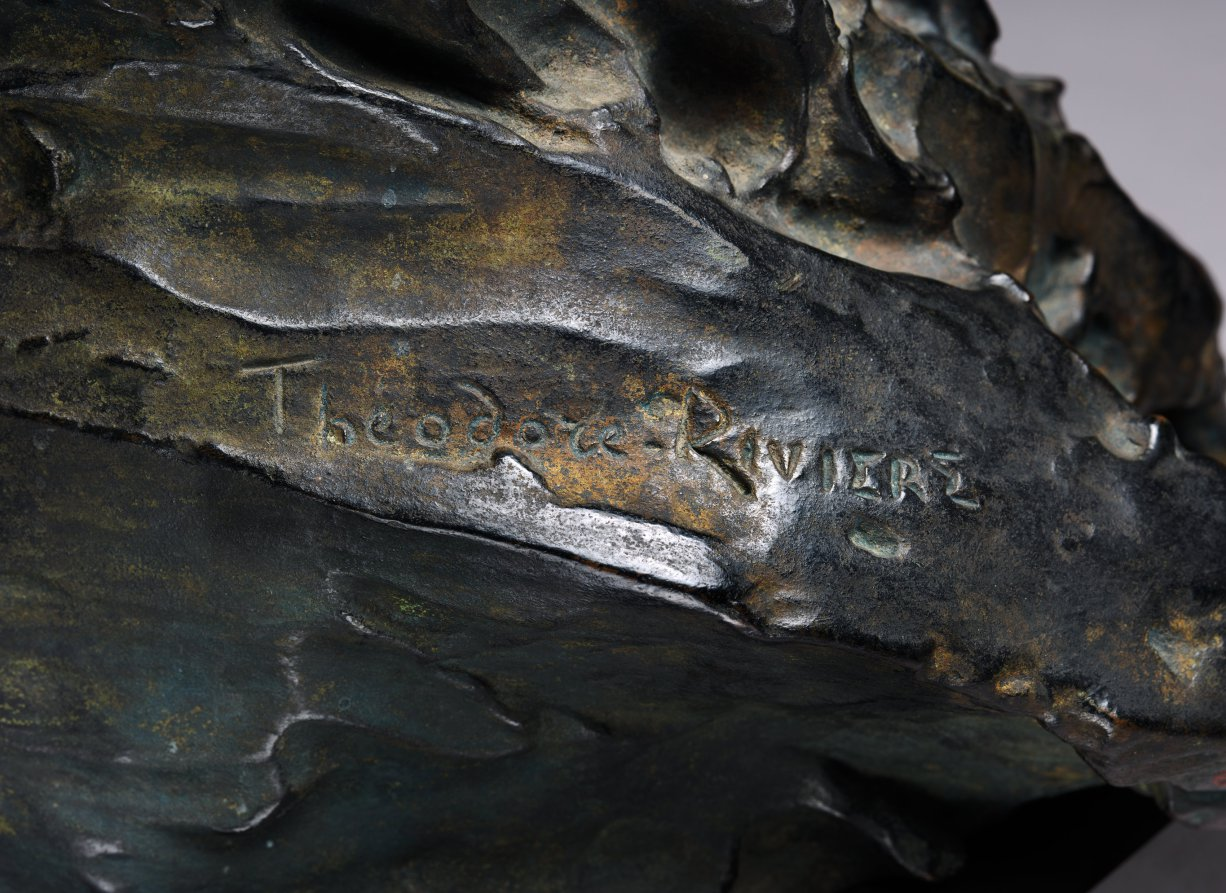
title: Bust of Tolstoy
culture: France, late 19th-early 20th century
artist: Théodore Rivière (French, 1857–1912)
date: d. 1985 – 1905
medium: bronze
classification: Sculpture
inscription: Signed on back of shoulder to left: "Theodore Riviere"